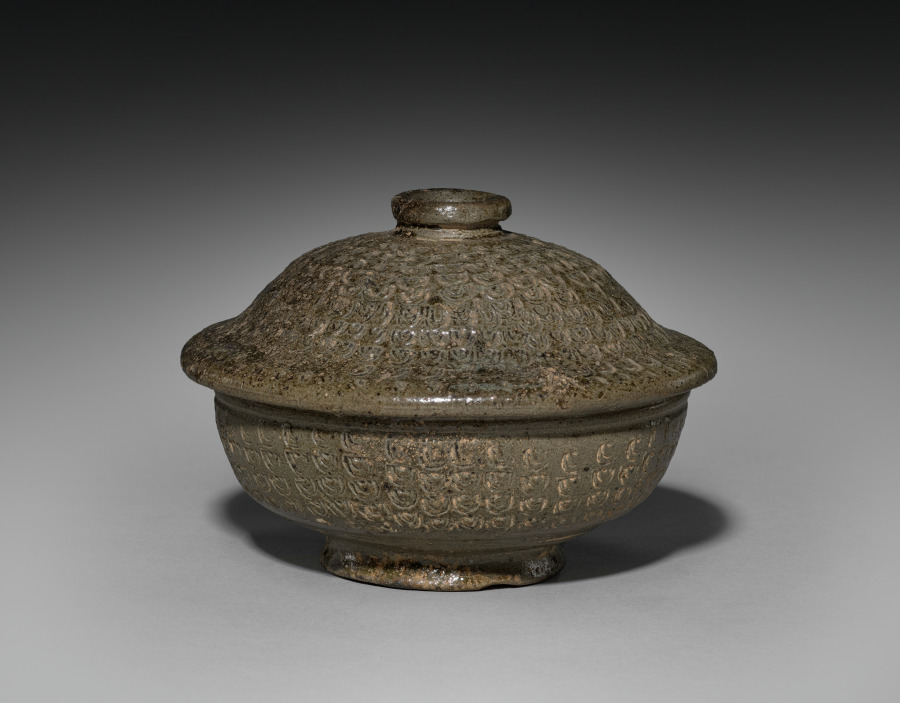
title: Burial Urn with Stamped Design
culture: Korea, Unified Silla period (676-935)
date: 500s–600s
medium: stoneware with stamped designs under olive-green glaze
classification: Ceramic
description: After the introduction of Buddhism, cremation became a common practice in Korea. This jar, which once contained the remains of the dead, may have nested in a larger stone container. The repetitive patterns that appear on the lid and the container was done with a stamping technique.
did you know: Containing the remains of the dead, this type of ancient clay pottery was excavated from tombs.